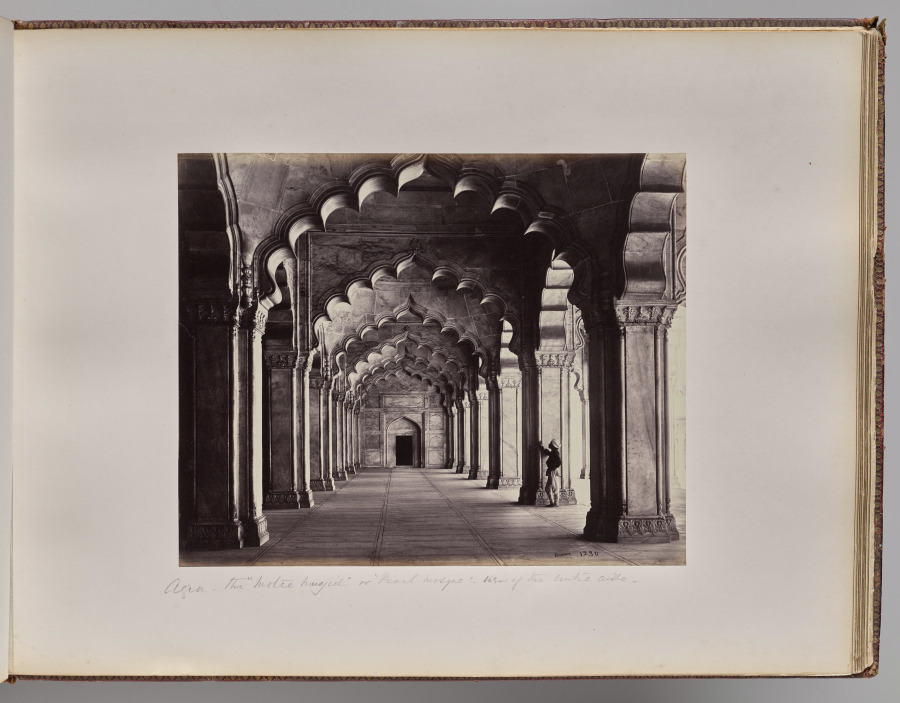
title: Agra. The Motee Hasjid in Pearl Mosque. View of the Entire Aisle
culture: England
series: Photographs of Northern India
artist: Samuel Bourne (British, 1834–1912)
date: 1863–70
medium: albumen print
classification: Photograph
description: The 50 images in this album, all taken in the 1860s, move from the hill towns of the Himalayas down to cities including Lahore (now in Pakistan), Delhi, Lucknow, Agra, Benares (now Varansi), and Calcutta (now Kolkata). Architectural studies of major monuments offer valuable historical records of what sites such as the Taj Mahal and the imperial mosque of the Mughal emperors in Delhi looked like before twentieth-century restorations.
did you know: Samuel Bourne, the author of most the images in this album, was a banker in England before he moved to India to become a professional photographer.